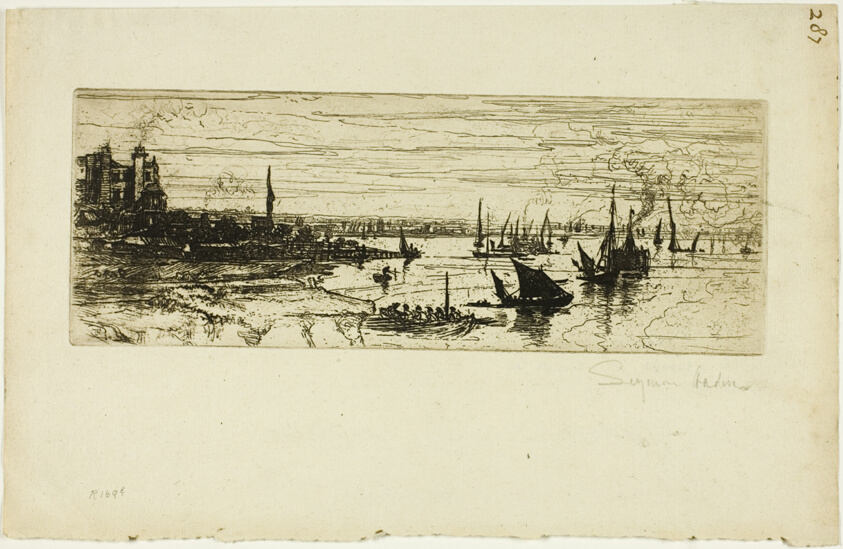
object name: Print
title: The Inn, Purfleet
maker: Francis Seymour Haden (English, 1818-1910)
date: c. 1869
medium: Etching and drypoint on zinc printed on ivory laid paper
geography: England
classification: etching; print; prints and drawing